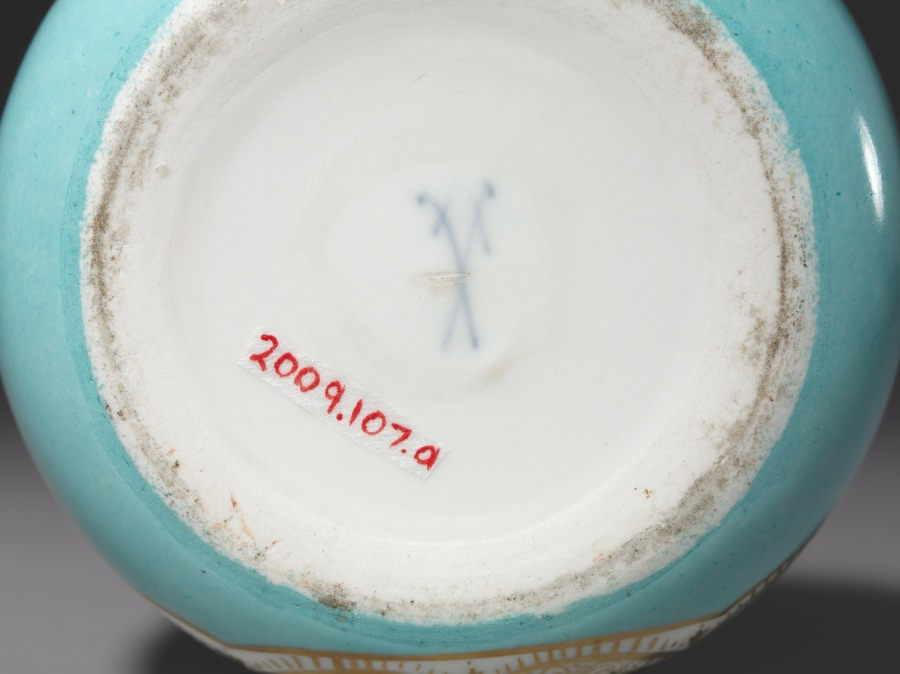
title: Sugar Bowl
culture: Germany, Meissen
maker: Meissen Porcelain Factory (German, est. c. 1710)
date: c. 1750–70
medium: porcelain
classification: Ceramic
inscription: Half moon mark on the bottom.